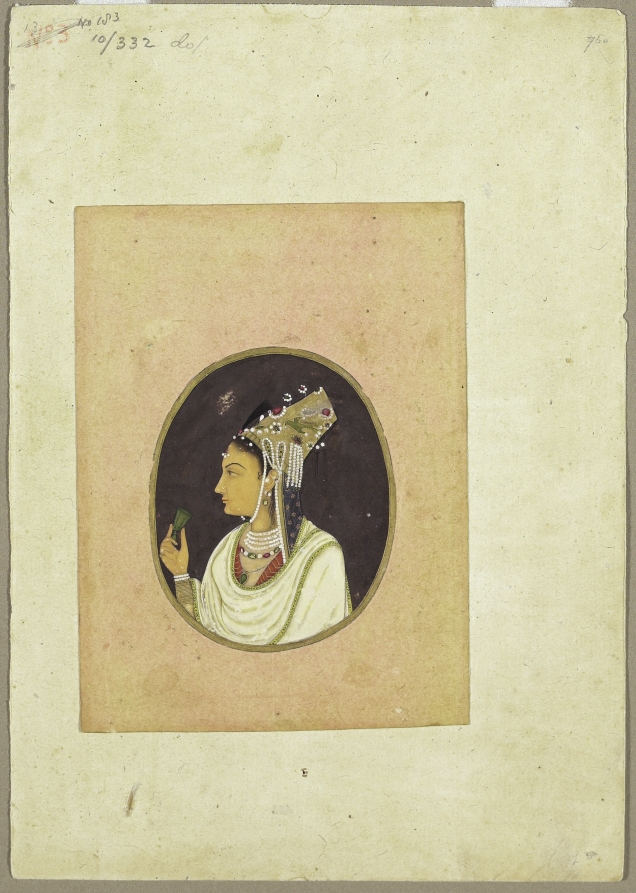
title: Oval portrait of a woman in a Chaghtai hat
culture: India, Mughal, 18th century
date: c. 1740–50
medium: Gum tempera and gold on paper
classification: Painting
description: The tall, flat-topped hat is an element of the native dress of the Mughals from eastern Uzbekistan. Of mixed Turkic and Mongol ethnicities, they spoke a Turkic language known as Chaghatai. Chaghatai refers to the name of the son of the Mongol Chingiz (Genghis) Khan, who ruled this area of Central Asia from 1246 to 1282. This woman’s hat has been studded with jewels and strings of pearls. The portrait jewel format that was once reserved for the emperor has now been expanded to include ladies of the court. The woman holds a jade wine cup and wears a draped upper garment with a woven or embroidered border similar to the fragment on display at the left.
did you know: She holds a delicate jade cup of the type for which the Mughals were famous.